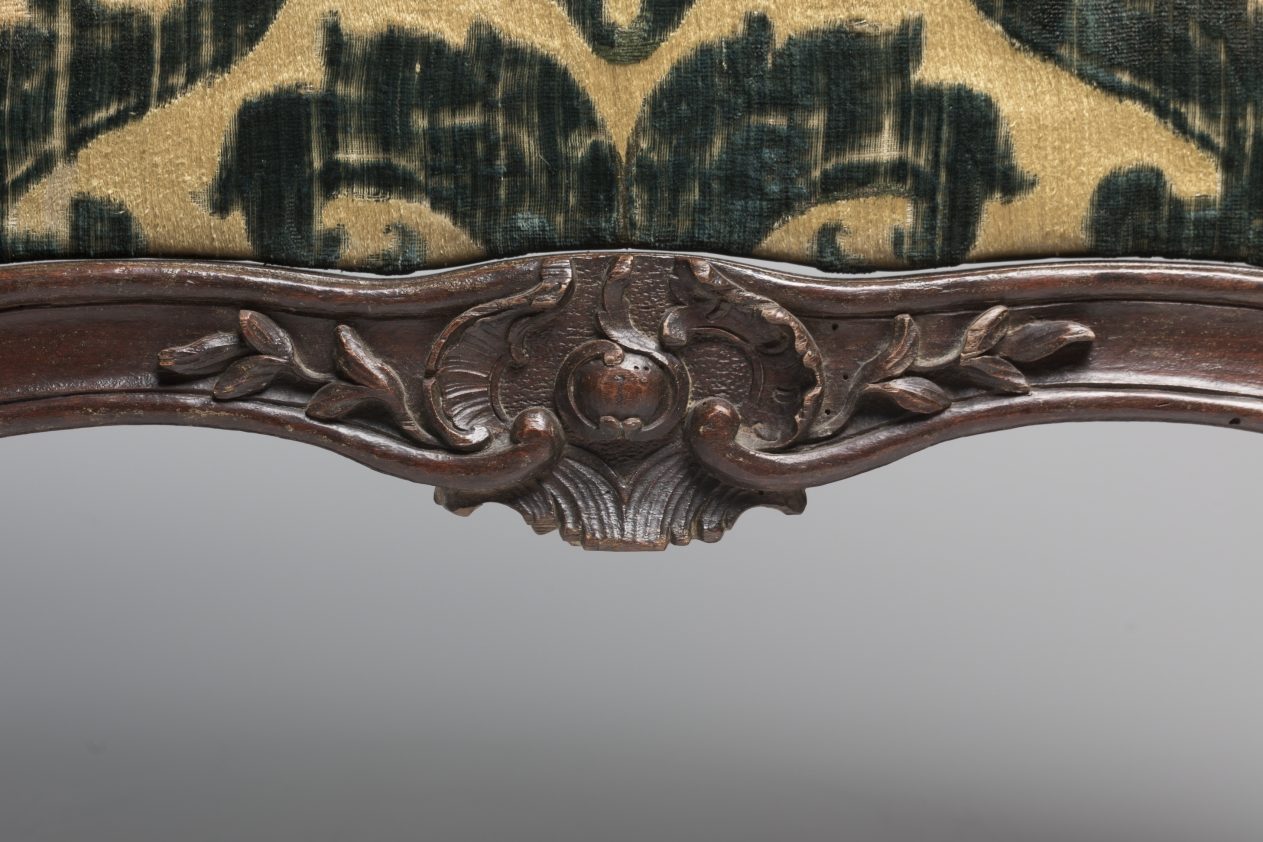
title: Fire Screen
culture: France, 18th century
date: c. 1750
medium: wood and velvet panel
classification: Furniture and woodwork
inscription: inscribed beneath in three places: 32.